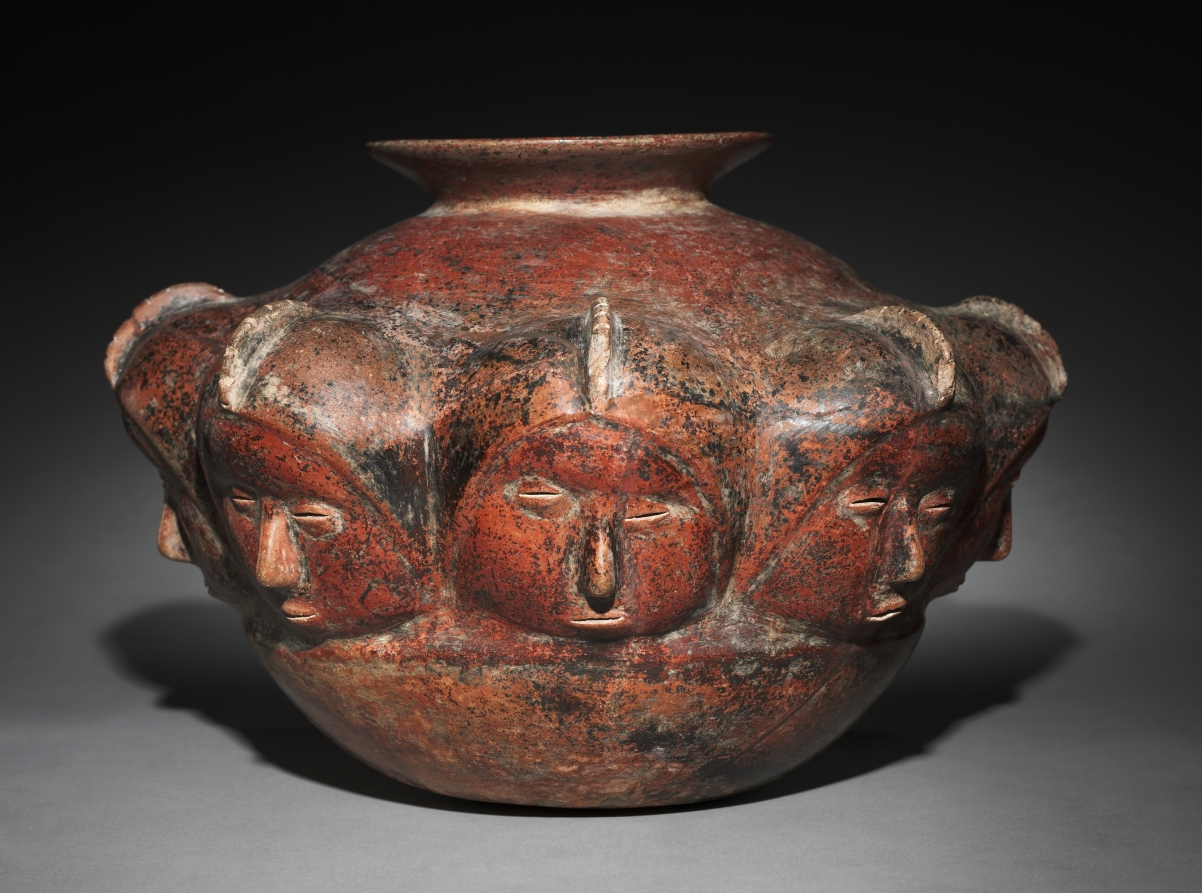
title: Vessel with Crested Heads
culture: West Mexico, Colima, Comala style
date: 200 BCE–300 CE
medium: earthenware with colored slip, black burial deposits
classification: Sculpture